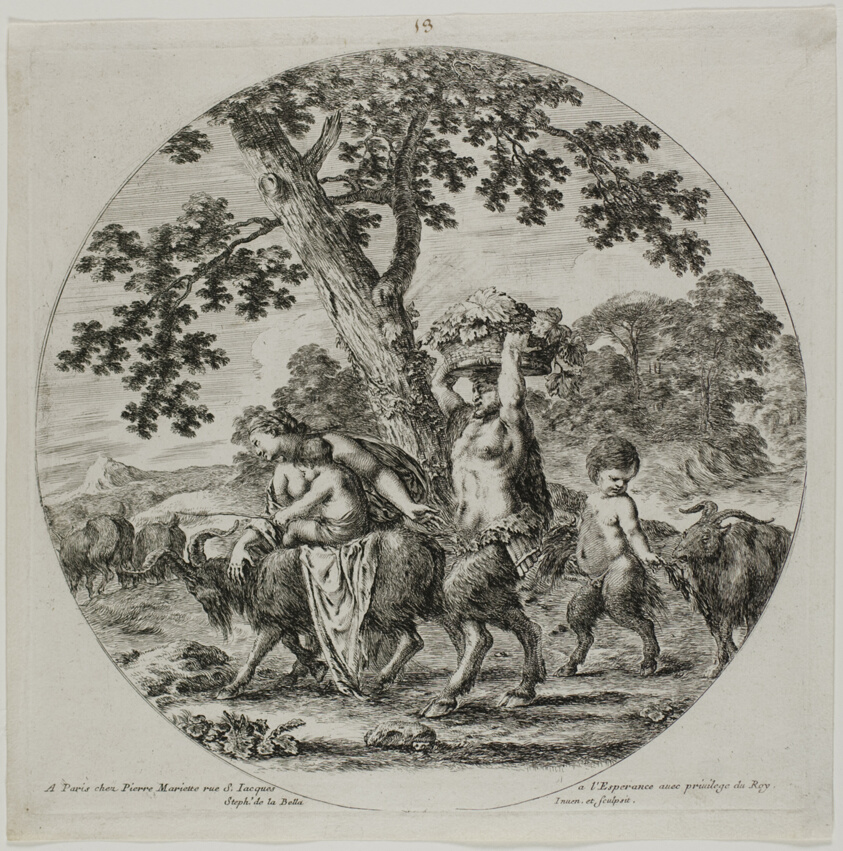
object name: Print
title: Satyr Family Walking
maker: Stefano della Bella (Italian, 1610-1664)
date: c. 1657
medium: Etching on ivory laid paper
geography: Italy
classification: etching; print; prints and drawing